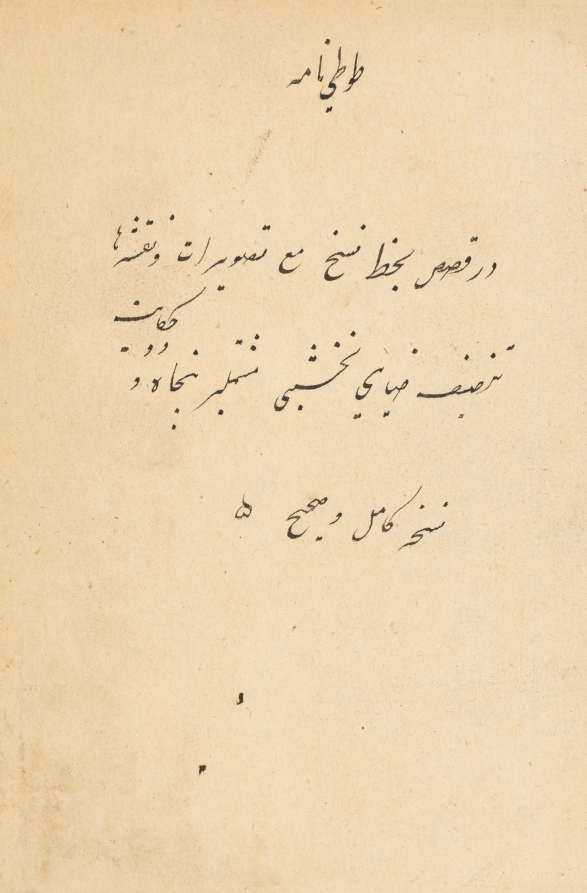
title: Tuti-Nama (Tales of a Parrot)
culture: Mughal India, court of Akbar (reigned 1556–1605)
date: c. 1560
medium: gum tempera, ink, and gold on paper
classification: Painting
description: The Tuti-Nama, written in Persian in the early fourteenth century, contains a series of fifty-two moralizing tales told by a clever, talking parrot. Each story is intended to instruct Khujasta and distract her from an adulterous affair. The Cleveland Museum of Art’s copy of the manuscript was painted for Emperor Akbar (r. 1556–1605) and represents the origins of Mughal painting.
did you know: Another Akbari Tuti-Nama, painted in the 1580s, is held in Dublin’s Chester Beatty Library.